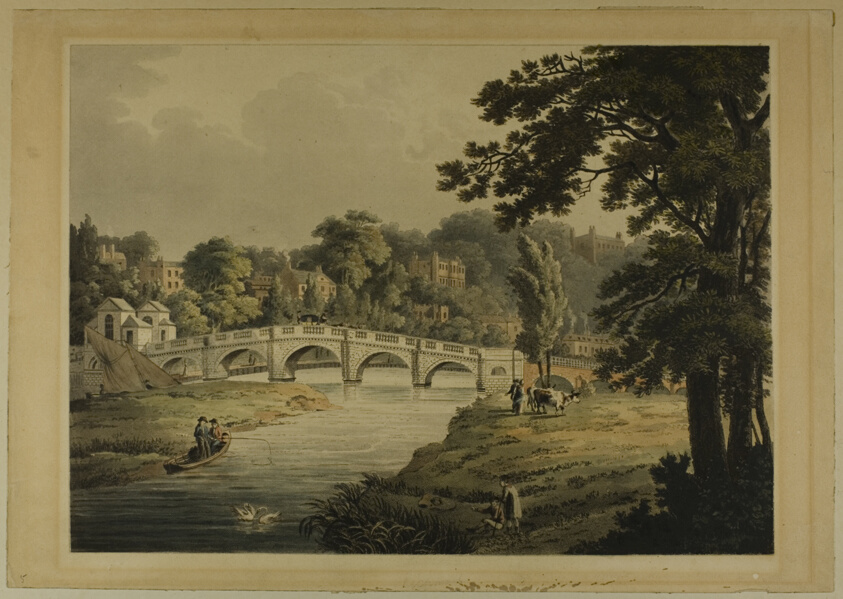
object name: Print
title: View of Richmond from the Bridge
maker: Thomas Sutherland (English, 1785-1825); after John Gendall (English, 1790-1865)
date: 1819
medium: Aquatint, heightened with watercolor, on paper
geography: England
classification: aquatint; print; prints and drawing